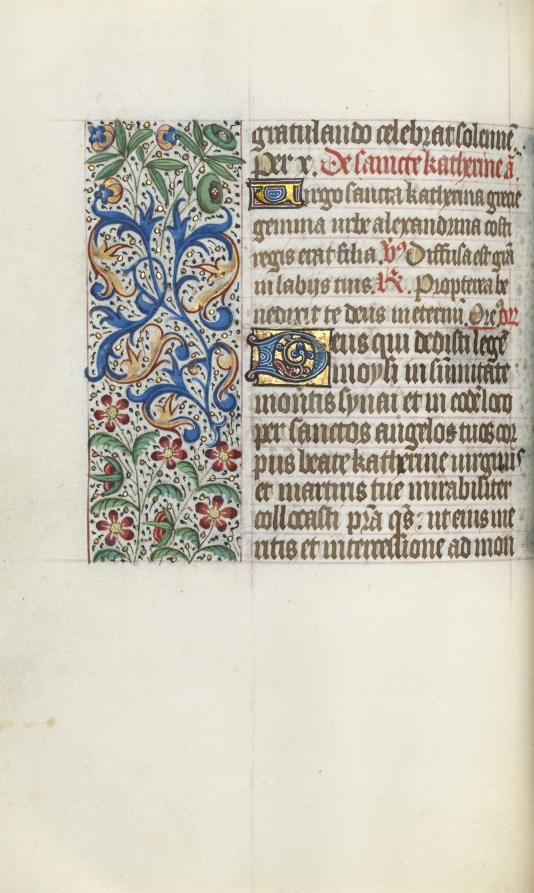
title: Book of Hours (Use of Rouen): fol. 53v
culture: France, Rouen, 15th century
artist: Master of the Geneva Latini (French, active Rouen, 1460–80)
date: c. 1470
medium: ink, tempera, and gold on vellum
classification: Bound Volume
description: In the late 1400s and early 1500s Rouen was an established and important center of book production. The city’s cathedral had a wealthy chapter that spent large sums of money to commission books and to maintain its extensive library. The stationers and booksellers would have likely been concentrated in or near the cathedral precinct. This artist, named after a manuscript now in Geneva, was Rouen’s principal illuminator during the second half of the 1400s.